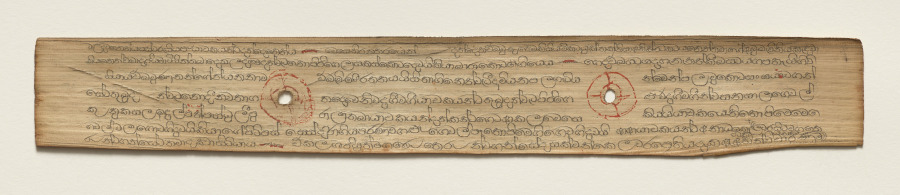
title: Leaf from a Buddhist Manuscript (verso)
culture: Sri Lanka, Singhalese, Late 17th century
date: c. 1700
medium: fiber paper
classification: Manuscript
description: Palm leaf material is still used for manuscripts in Sri Lanka. The palm leaves are prepared first by boiling them, drying them in the sun, and then rubbing them with oils. Scribes then use a metal stylus to incise the text. Then charcoal powder is wiped across the pages, filling in only the inscribed lines.